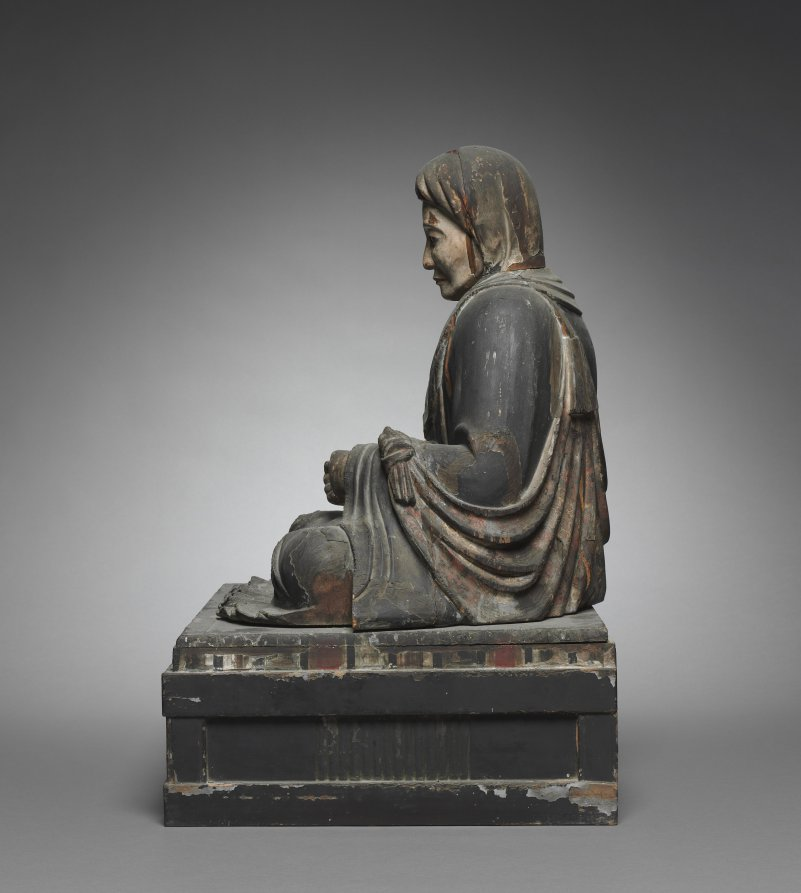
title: Portrait of the Mother of Hotto Kokushi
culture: Japan, Edo period (1615–1868)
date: 1680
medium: wood with polychromy and inlaid crystal and stone eyes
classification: Sculpture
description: This is an imaginary portrait of the mother of the Zen master Hottō Enmyō Kokushi (1203–1298), whose sculptural portrait (1970.67) can be seen in gallery 235B. That image was carved soon after the master's death. His mother's image, however, was completed several hundred years later, so the likeness is doubtful.